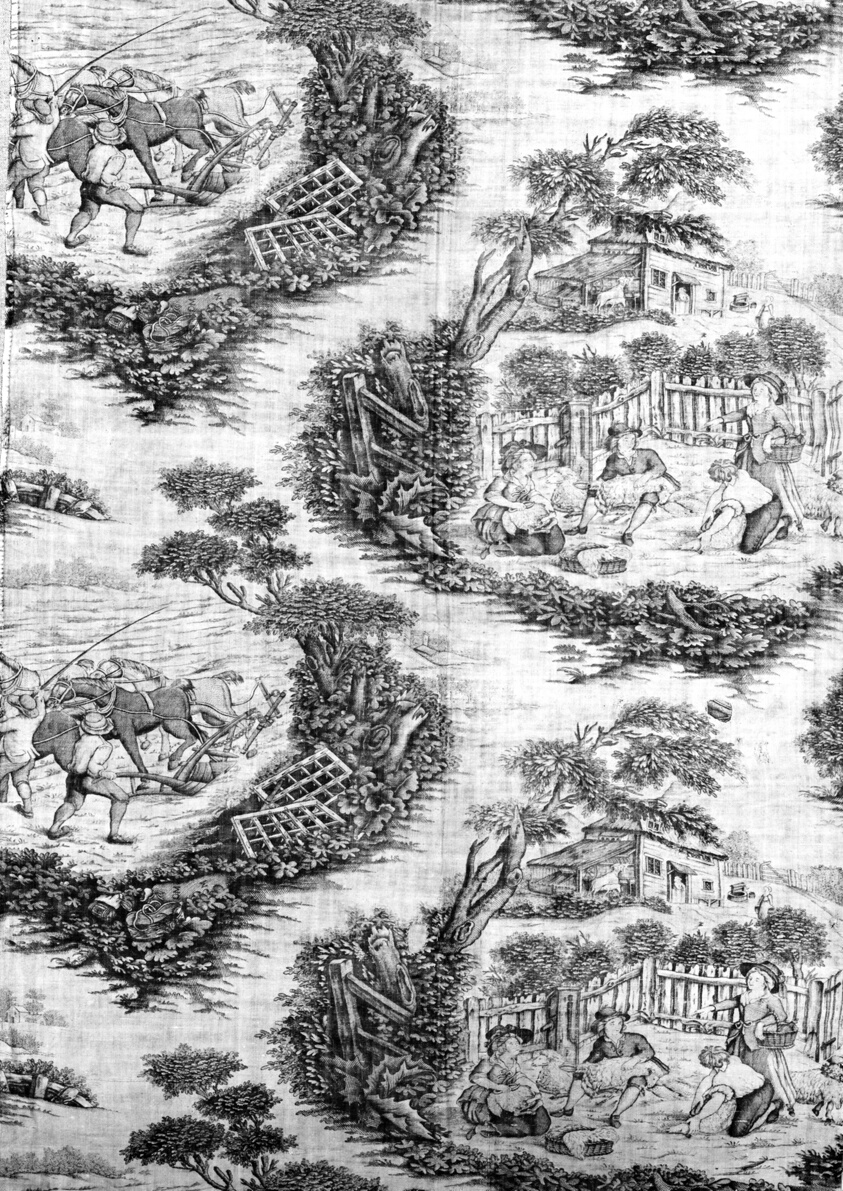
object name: Textile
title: Panel (Furnishing Fabric)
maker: England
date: c. 1785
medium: Cotton, plain weave; copperplate printed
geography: England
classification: textile; weaving - printed; weaving; furnishing textile